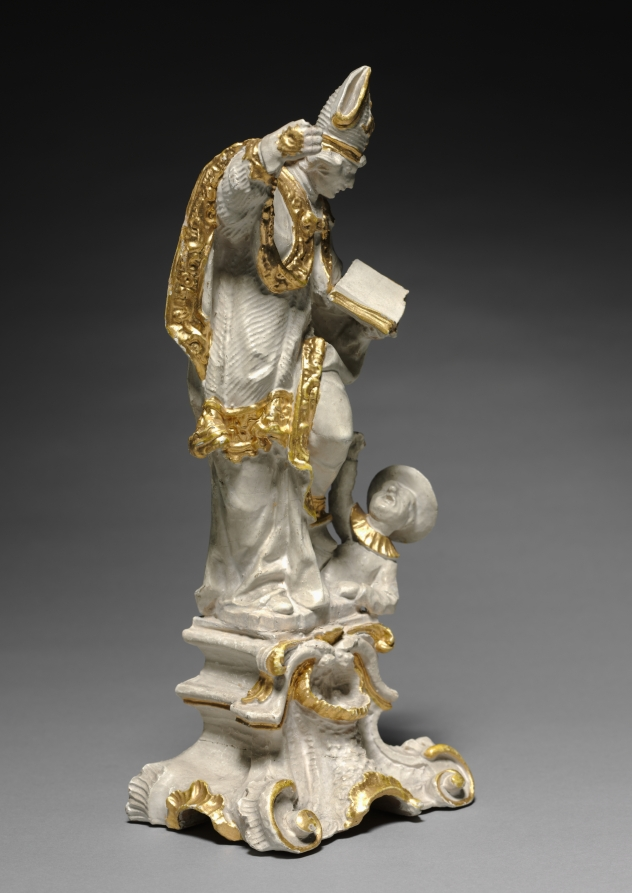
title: Bishop Saint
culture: Germany, 18th century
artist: attributed to Ferdinand Tietz (Austrian, 1708–1777)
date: c. 1740–1750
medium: painted and gilded wood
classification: Sculpture